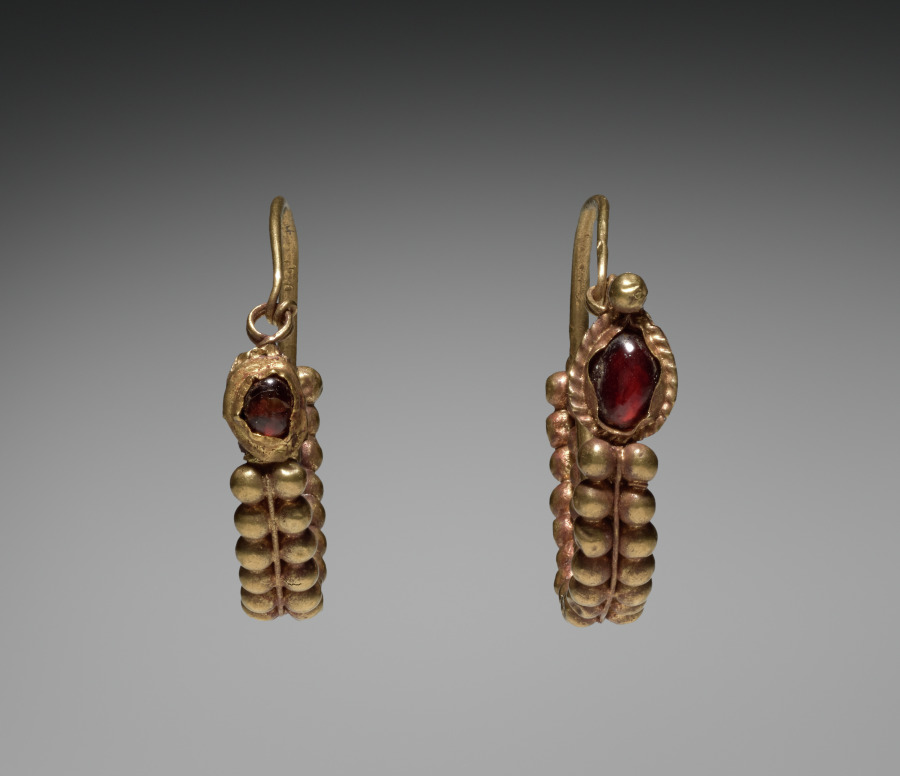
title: Earrings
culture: Syria, Roman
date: 100 BCE–100 CE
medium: gold and garnet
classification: Jewelry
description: Each of these earrings is formed from a simple hoop that ends in a hook-and-loop closure. An oval garnet is fixed below the loop on each earring; one earring has a much larger garnet, and a small ball affixed above the setting. The lower portion of each earring is decorated with two parallel rows of granules.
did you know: These two earrings are nearly identical; one lacks a gold bead above the garnet.